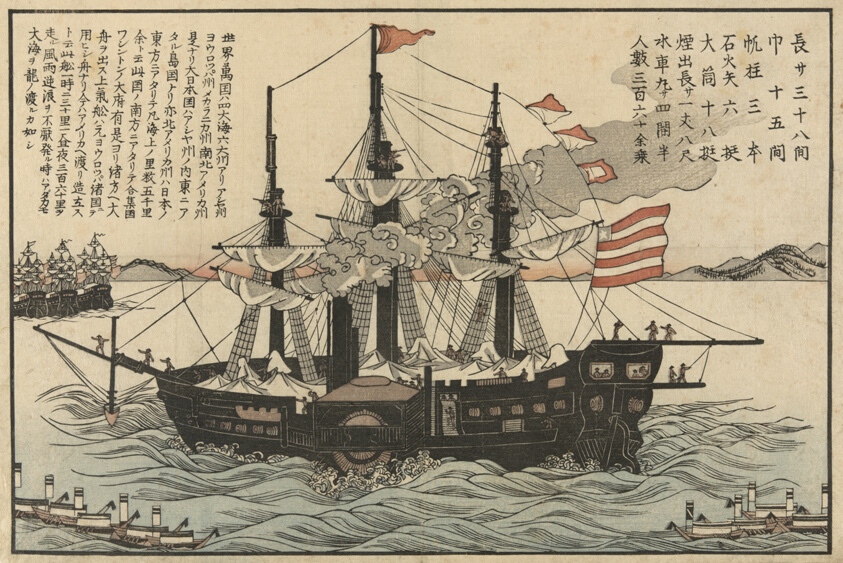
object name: Print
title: The Powhatan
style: Japanese (culture or style)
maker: Artist unknown; Japanese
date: c. 1854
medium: Color woodblock print; yoko-oban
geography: Japan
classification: woodblock print; print; asian art